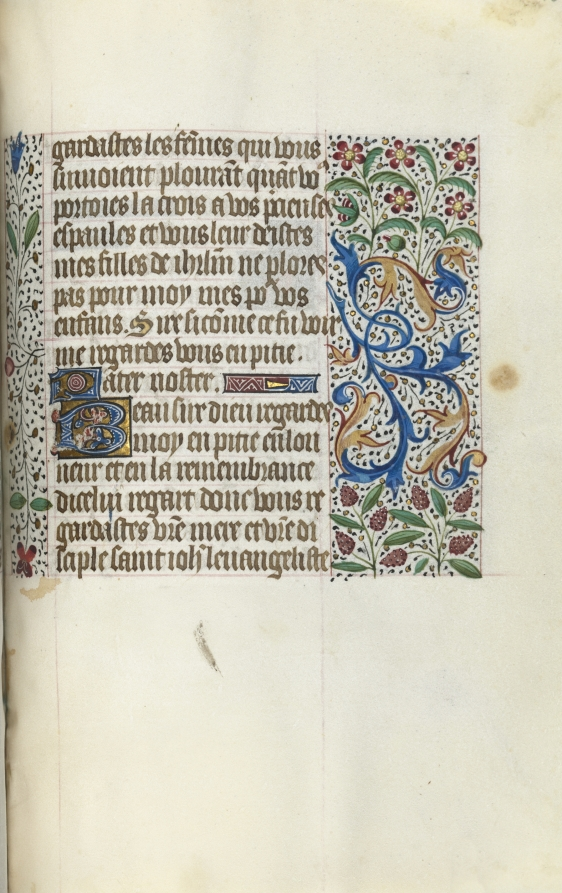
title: Book of Hours (Use of Rouen): fol. 154a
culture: France, Rouen, 15th century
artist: Master of the Geneva Latini (French, active Rouen, 1460–80)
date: c. 1470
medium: ink, tempera, and gold on vellum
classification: Bound Volume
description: In the late 1400s and early 1500s Rouen was an established and important center of book production. The city’s cathedral had a wealthy chapter that spent large sums of money to commission books and to maintain its extensive library. The stationers and booksellers would have likely been concentrated in or near the cathedral precinct. This artist, named after a manuscript now in Geneva, was Rouen’s principal illuminator during the second half of the 1400s.